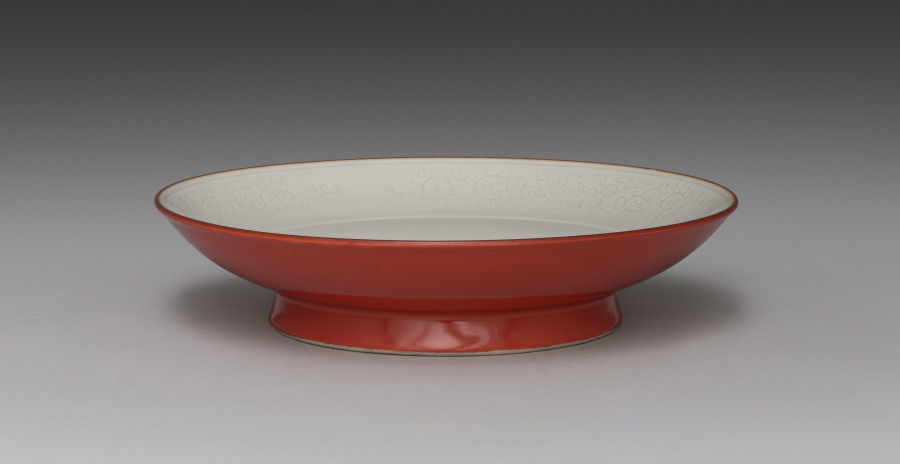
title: Dish with Carp in Waves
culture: Japan, Meiji period (1868–1912)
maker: Seifū Yohei III (Japanese, 1851–1914)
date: 1893–1914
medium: Porcelain with incised designs, iron oxide, and red glaze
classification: Ceramic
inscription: 清風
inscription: 清風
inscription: 清風盧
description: The exterior of this low, wide dish with flared foot is covered with a red coral glaze. Its interior is white with incised designs, and the rim is decorated with brown iron oxide. The primary design occupies the flat bottom of the bowl and is bound within a single band. It is of a carp swimming vigorously against roiling waves with frothy crests moving in multiple directions; the water just above the fish’s head is beginning to form a whirlpool. A closer look at the fish’s face reveals that it somewhat resembles that of a dragon. It is possible that the motif is meant to be a carp who jumps over the waterfall and transforms into a dragon, who flies into the sky. The iconography symbolizes the transformative experience of striving to one’s utmost and achieving the impossible against tough odds. Originating in China, the narrative’s visual representation as well as its meaning crossed the ocean to Japan, where it often appeared on items gifted to those celebrating pivotal successes in life, such as obtaining elevated status in one’s work or graduating from an academic program.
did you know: The inside walls of the bowl are decorated with three abstract flowers, each represented with five circles ringing a central circle, from which leafy tendrils stretch in both directions .